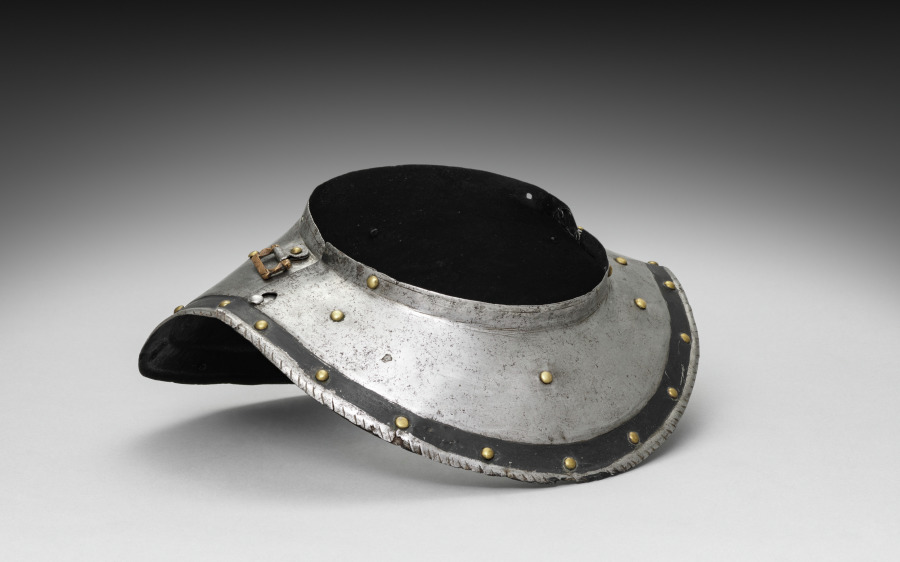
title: Colletin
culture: Germany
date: c.1550–1570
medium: iron, steel, leather and brass rivets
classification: Arms and Armor